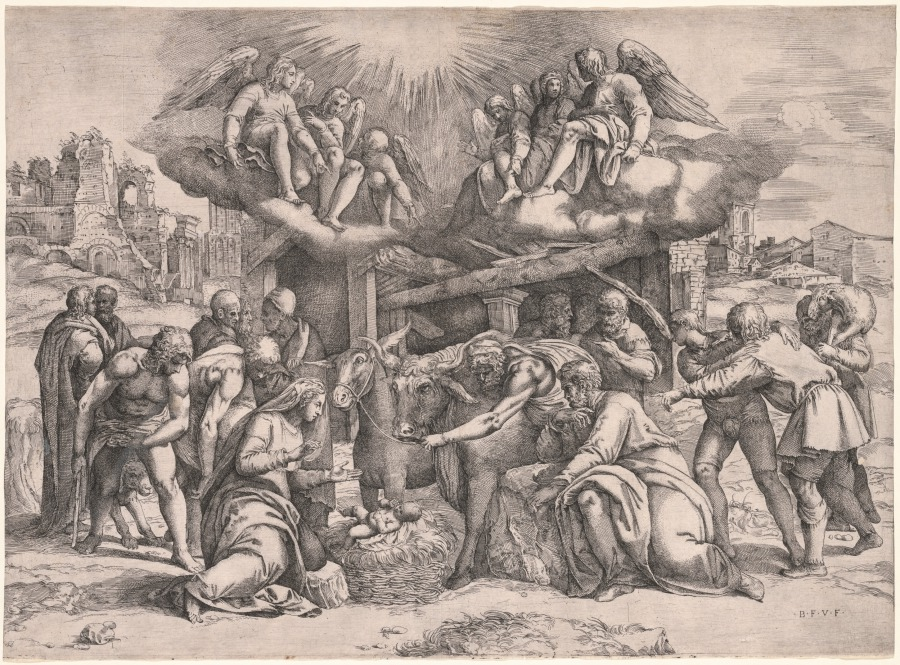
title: The Adoration of the Shepherds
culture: Italy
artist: Battista Franco (Italian, c. 1510–1561)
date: c. 1552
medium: Etching and engraving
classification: Print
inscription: Watermark: anchor in circle (similar to Briquet 523 and 532)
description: Battista Franco was one of Michelangelo’s most devoted followers: his biographer Giorgio Vasari wrote that he drew every figure on the master’s Sistine Chapel ceiling. In Franco’s own works, such as this print, he made new, inventive compositions that emulated Michelangelo without directly copying or quoting his works. The print depicts the group of shepherds who visited the Christ child shortly after his birth. Franco used twisting, active poses and emphasized anatomy and musculature, creating distinct groups of figures in the foreground and background. Guided by a host of angels, the shepherds’ twisting bodies, pointing gestures, and directional gazes—mirrored by those of an ass and a cow—offer witness to the miraculous birth. Groups of men conversing in the background offer a more intellectual approach to the miracle, while Joseph gazes calmly and contemplatively from the right.